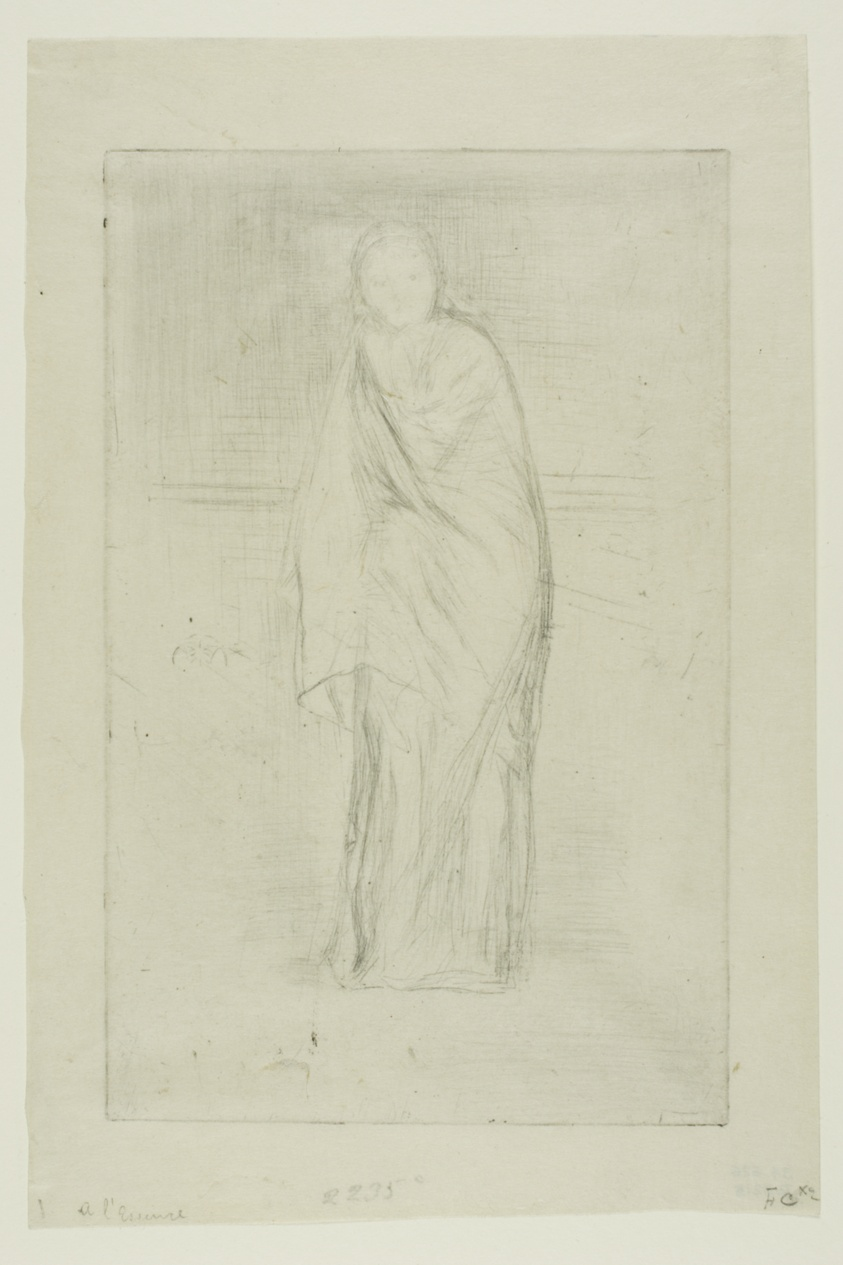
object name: Print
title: Draped Model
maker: James McNeill Whistler (American, 1834-1903)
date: 1873/1874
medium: Drypoint in black ink on cream Japanese paper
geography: United States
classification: drypoint; print; prints and drawing; paper